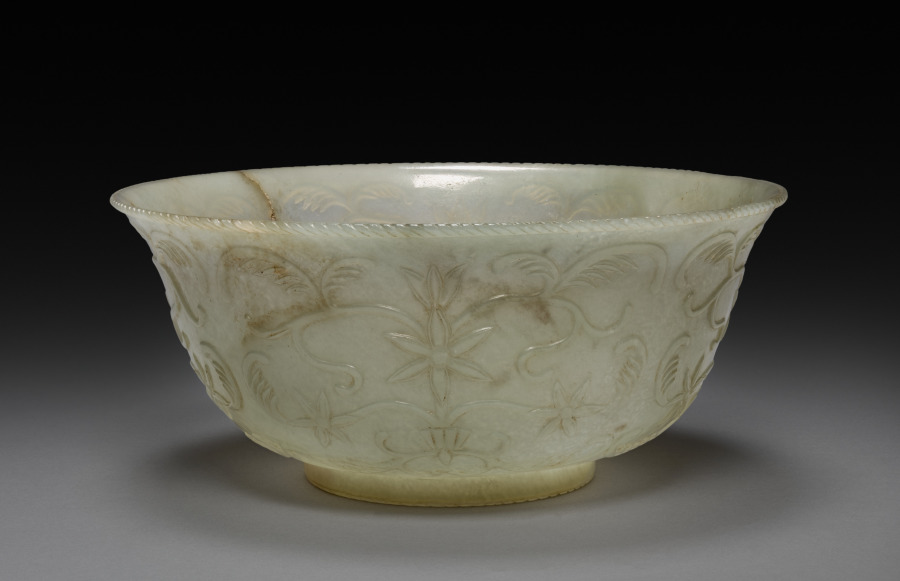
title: Bowl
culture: China, Qing dynasty (1644-1911)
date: 18th Century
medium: jade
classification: Jade